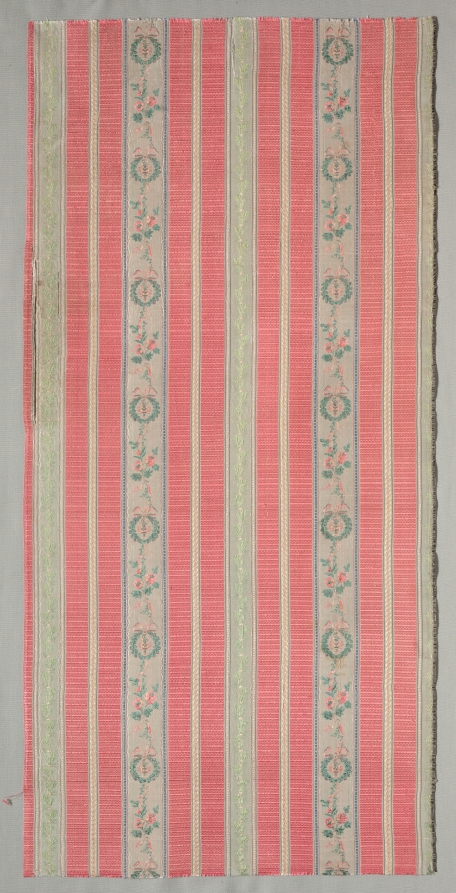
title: Length of Textile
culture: France, 18th century, period of Louis XVI (1774-1793)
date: 1774–1793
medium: plain cloth, warp brocade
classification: Textile